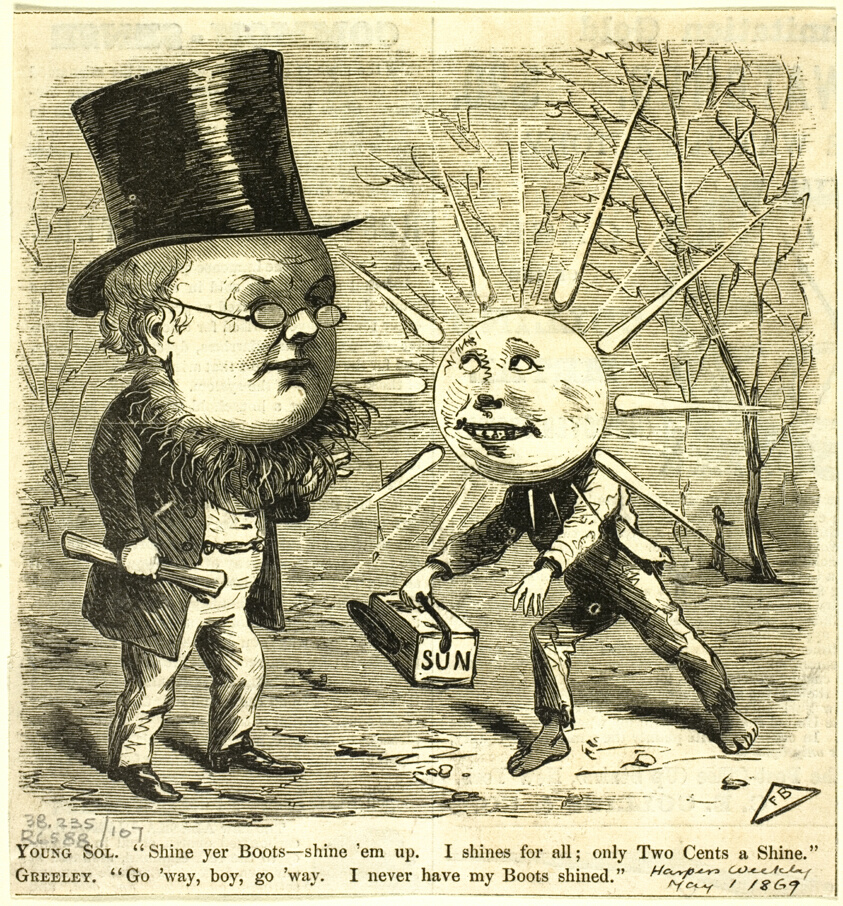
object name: Print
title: Young Sol and Greely, from Harper's Weekly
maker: Frank Beard (American, 1842-1905)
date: published May 1, 1869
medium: Lithograph on newsprint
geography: United States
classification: lithograph; print; prints and drawing